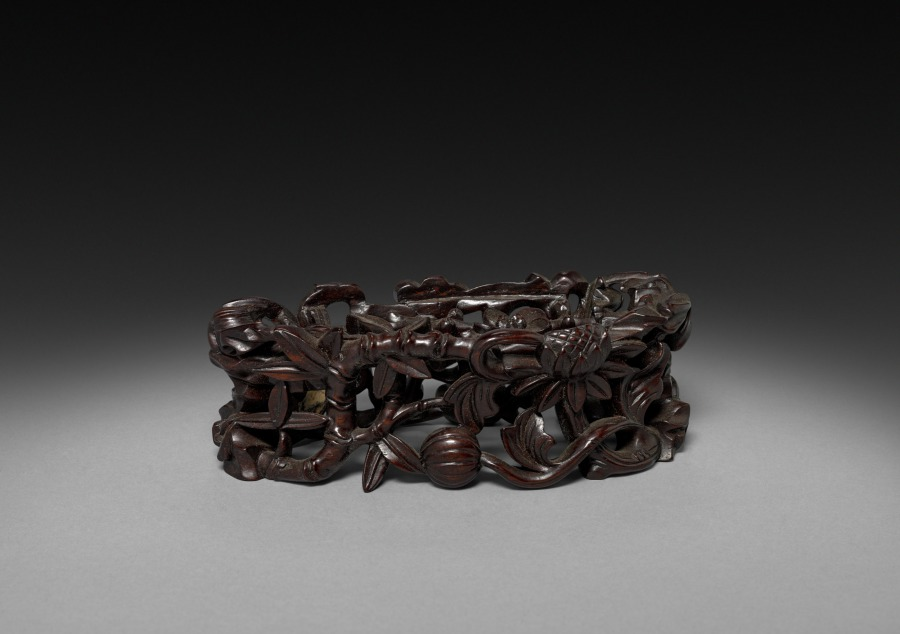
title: Bodhisattva Guanyin Seated in a Rock Grove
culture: China, Qing dynasty (1644-1911)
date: 1675–1700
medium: opaque ochre and translucent red-orange amber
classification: Sculpture